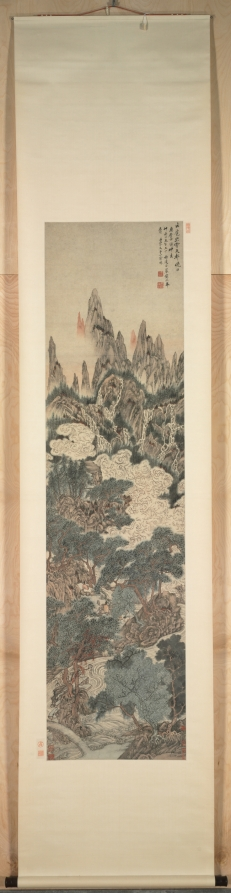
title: Morning Sun over Heavenly Citadel Peak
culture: China, Ming dynasty (1368–1644)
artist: Ding Yunpeng (Chinese, 1547-c. 1628)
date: 1614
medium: Hanging scroll; ink and light color on paper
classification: Painting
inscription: Artist's inscription, signature, and 2 seals: Clouds arise from the dale of the "Dark Plateau," The morning sun is over the peak of the Heavenly Citadel. In mid-spring of the chia-yen year of the Wan-li era [1614], painted as a fiftieth birthday present to Mr. Chung-lu. Junior Friend of Family Alliance, Ting Yün-p'eng [seals] Yün-p'eng chih yin; Ting Nan-yü.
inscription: 10 additional seals: 5 of Kao Hsiang-ling (dates unknown); 5 unidentified.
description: A birthday gift, this scroll by Ding Yunpeng from Anhui is among the earliest paintings of Mount Huang (Yellow Mountains), here depicting Heavenly Citadel Peak. The mountains are named after the legendary Yellow emperor who is said to have visited the place to look for the essence of immortality. Deep red strokes accentuate vegetation and allude to cinnabar, the alleged elixir of immortality. Difficult to climb and access, Mount Huang in Anhui province did not become a destination for hikers nor a subject for artists before the late Ming dynasty, when steps were built. Today its towering peaks are a national site and tourist attraction.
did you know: Mount Huang, known for its scenic beauty, is one of China's major tourist attractions.